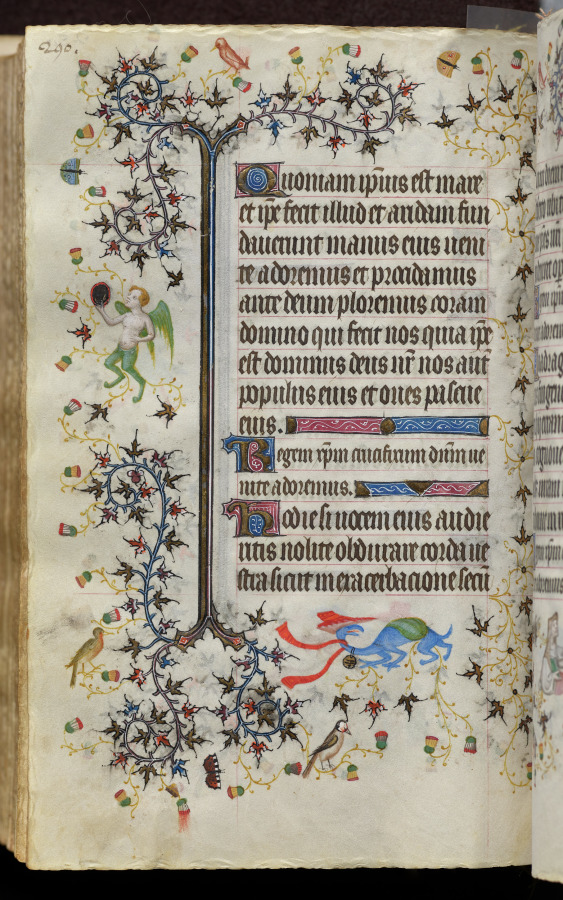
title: Hours of Charles the Noble, King of Navarre (1361-1425): fol. 145v, Text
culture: France, Paris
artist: Master of the Brussels Initials and Associates (French)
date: c. 1405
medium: ink, tempera, and gold on vellum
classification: Bound Volume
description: This precious volume was obviously highly prized by its owner, the French-born King of Navarre, who had his coat of arms painted on no less than twenty folios. Rather than directly commissioning this manuscript from a specific workshop, it seems that Charles the Noble acquired his book of hours -- perhaps ready-made for the luxury market -- while on a trip to Paris in 1404-05. A collaborative effort, six painting styles are evidenced within the pages of this codex, those of two Italians, two Frenchmen, and two Netherlanders. The painter who was responsible for the planning and decoration of the book, and who produced seventeen of the large miniatures, was a Bolognese artist known as the Master of the Brussels Initials. His principal assistant, responsible for most of the borders, was a Florentine who signed his name "Zecho" da Firenze on folio 208 verso.